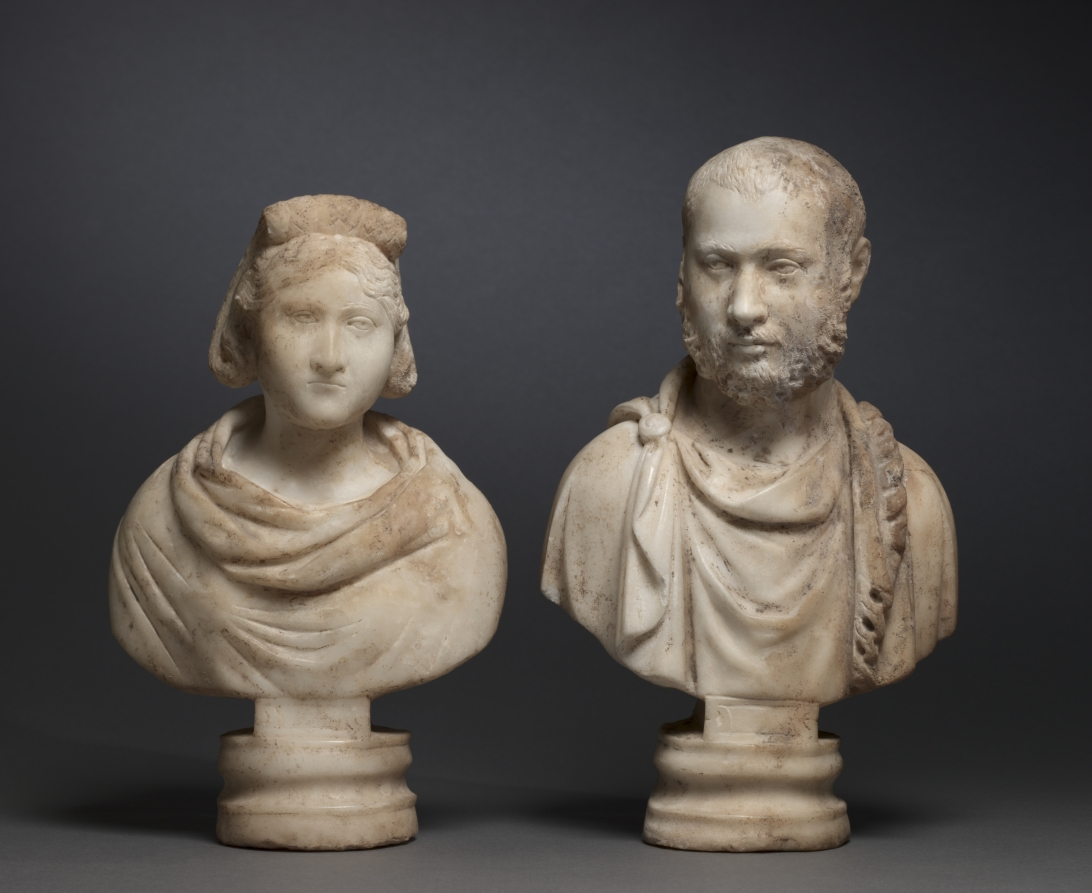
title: Portrait Bust of an Aristocratic Woman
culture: Anatolia, late Roman-early Christian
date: 280–90 CE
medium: marble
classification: Sculpture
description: These three pairs of marble portrait busts depict an aristocratic Roman couple. They are unique in representing the same couple three times with only minor variations in costume. Allegedly found together with the Jonah Marbles, they may represent the Christian patrons who commissioned the Jonah cycle.